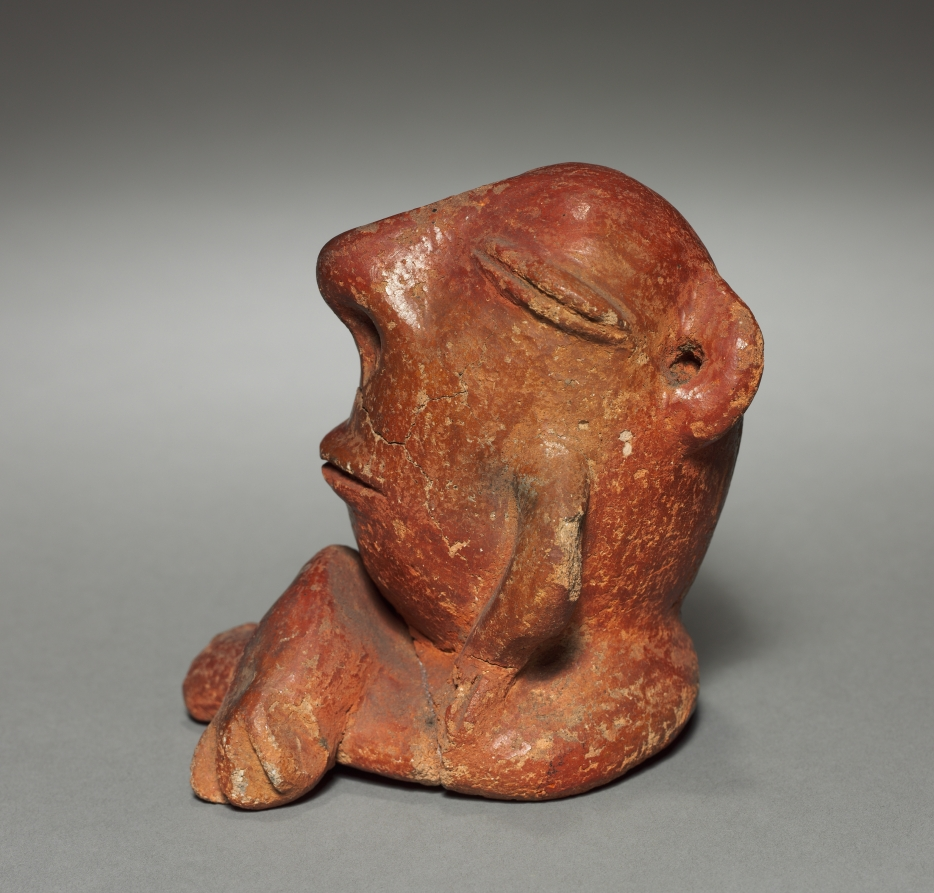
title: Grotesque Figure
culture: Colombia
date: before 1921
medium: red ware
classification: Ceramic